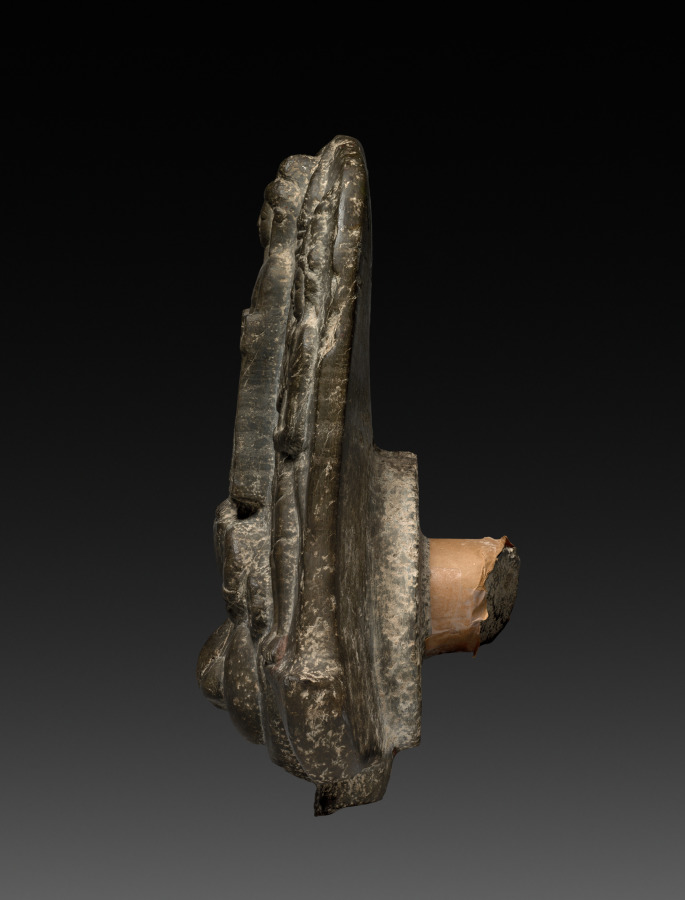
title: Bracket with Buddha and a Pair of Acolytes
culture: Thailand, Mon-Dvaravati style, probably from Nagara Pathama, 8th-9th Century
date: 700s–800s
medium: gray schist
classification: Sculpture